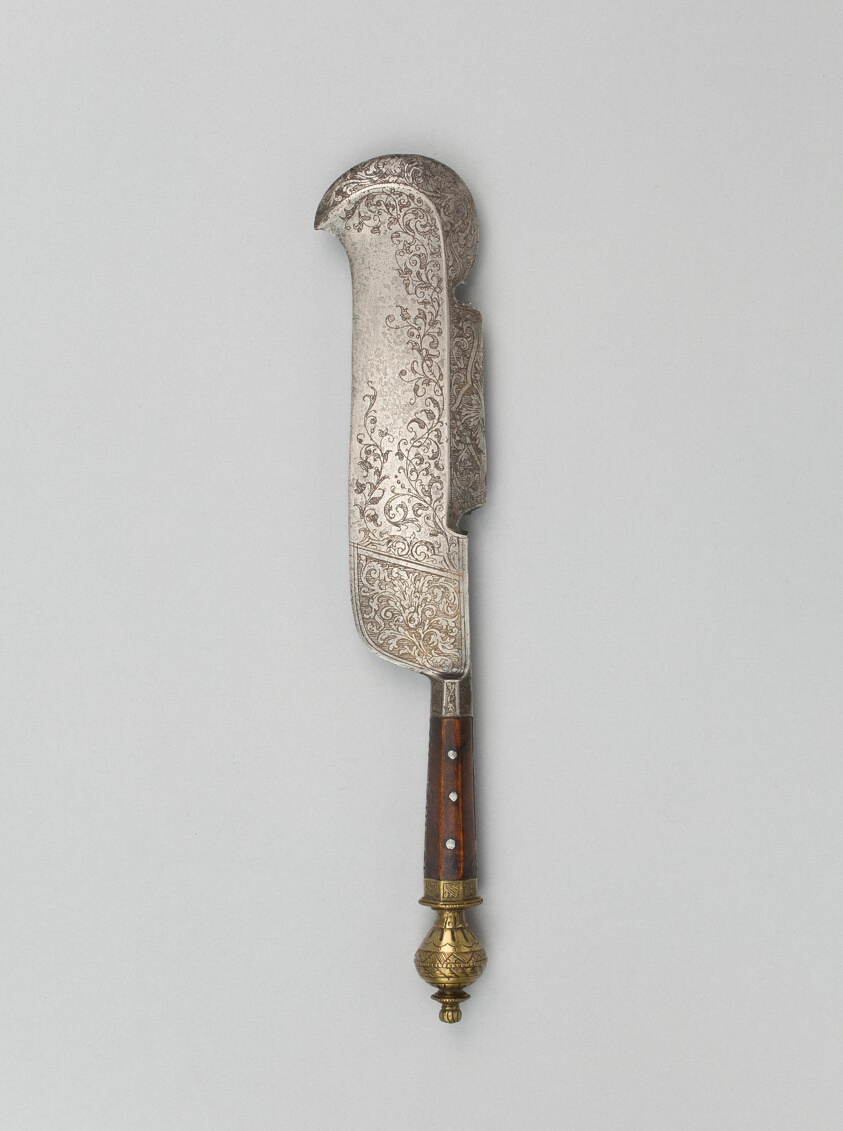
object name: Arms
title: Cleaver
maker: German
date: early 17th century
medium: Steel, wood, and brass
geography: Germany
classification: cutlery; arms and armor, miscellaneous; arms and armor; arms